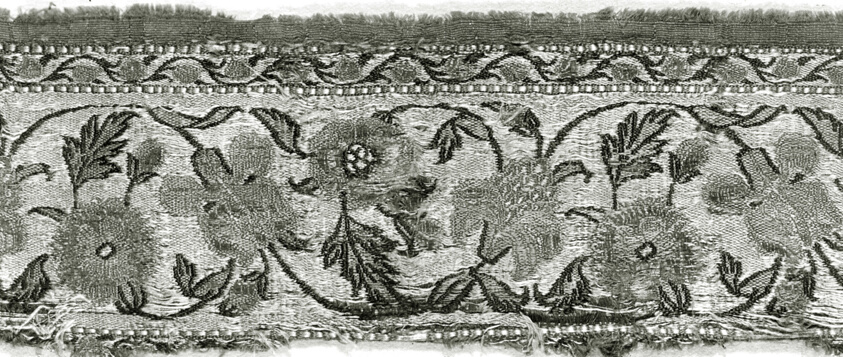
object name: Textile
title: Fragment (Border)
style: isfahan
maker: Iran (Persia, Isfahan)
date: 18th century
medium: Brocaded compound cloth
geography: Iran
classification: textile; weaving